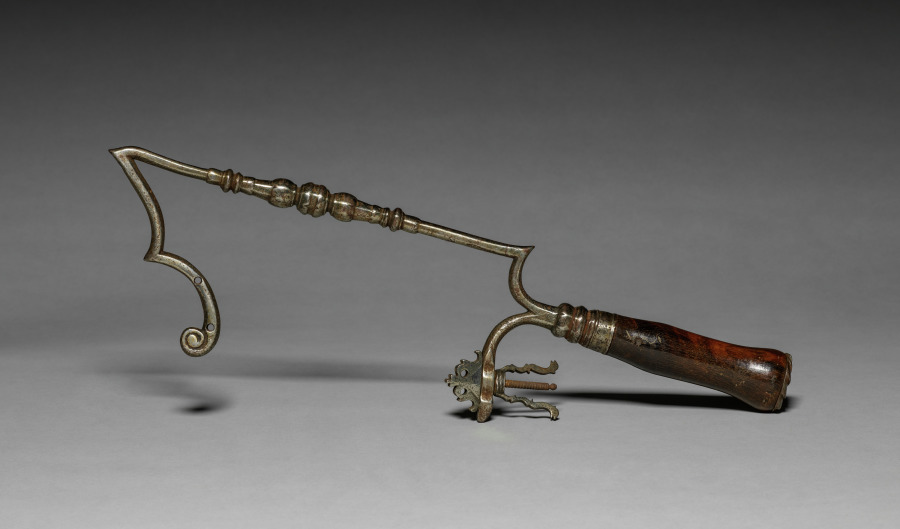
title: Hand Saw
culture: Europe, 17th century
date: 1600s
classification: Tool